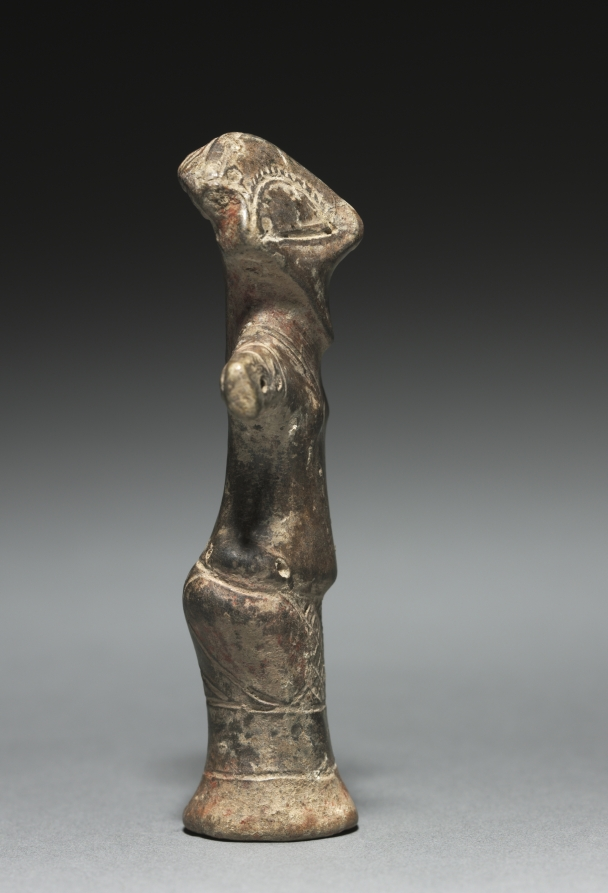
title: Vinca Idol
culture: Serbia, Vinça culture, Neolithic Era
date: 4000 BCE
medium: fired clay with paint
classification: Ceramic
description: This statuette, probably a cult idol, dates to the Neolithic Era which saw the development of farming and human technology. It is extraordinarily well preserved and derives from the settlement at Vinca in modern Serbia. This flourishing culture was the largest known in Europe at that time, extending along the Danube into the Balkans and Central Europe. Thousands of clay statuettes have been discovered in the region's Vinca settlements suggestive of the intense magic-religious practices within the Vinca culture. This statuette is anthropomorphic, or human-shaped, and is presumed to have been used for ritual purposes. The use of red paint is typical of Vinca Neolithic figurines, and few have survived in such excellent condition.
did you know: This figurine depicts a female deity with a protruding belly and plump buttocks.